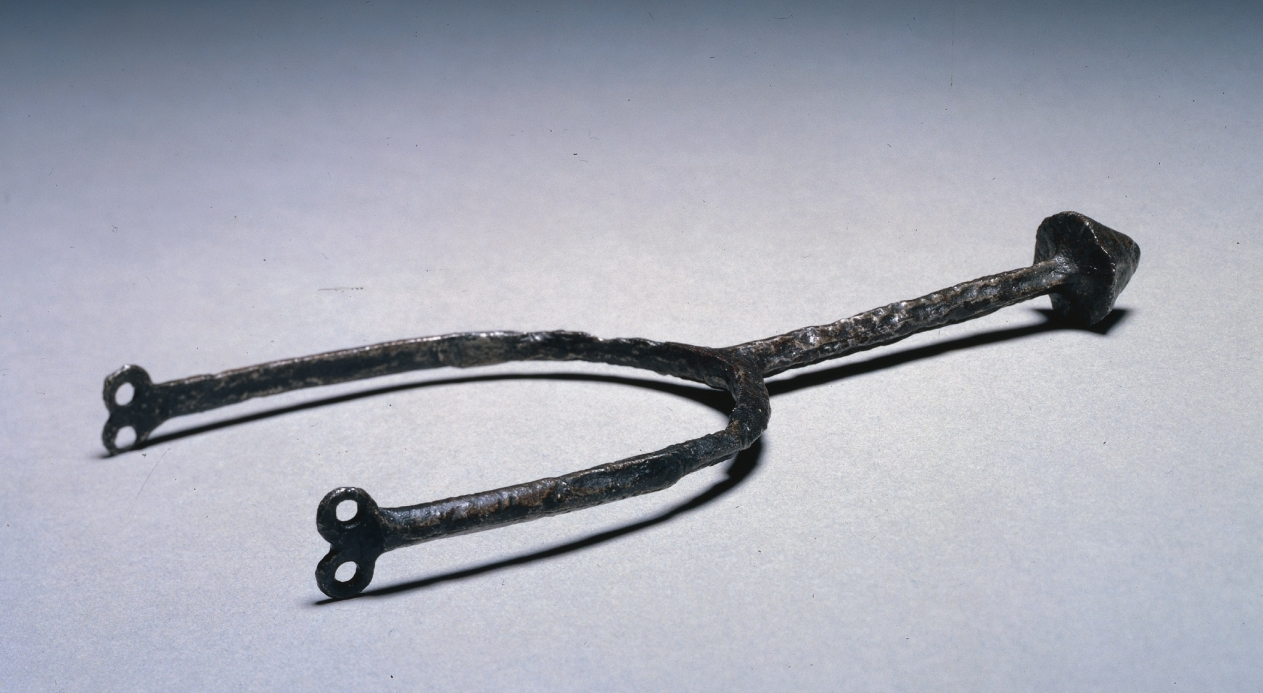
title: Pricked Spur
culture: Spain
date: 1200s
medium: steel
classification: Arms and Armor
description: The spur was an essential part of the knight's equipment. Fastened to his heels by means of straps and buckles, it was used to prod a horse into action. This example represents the oldest type recorded, the "pricked" spur, so-called because its neck terminated in a spike. The pricked spur was replaced during the Middle Ages by the "rowel" spur, with a rotating spiked wheel.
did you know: Before they were made of metal, the earliest spurs were probably thorns that were attached to the back of the heel.